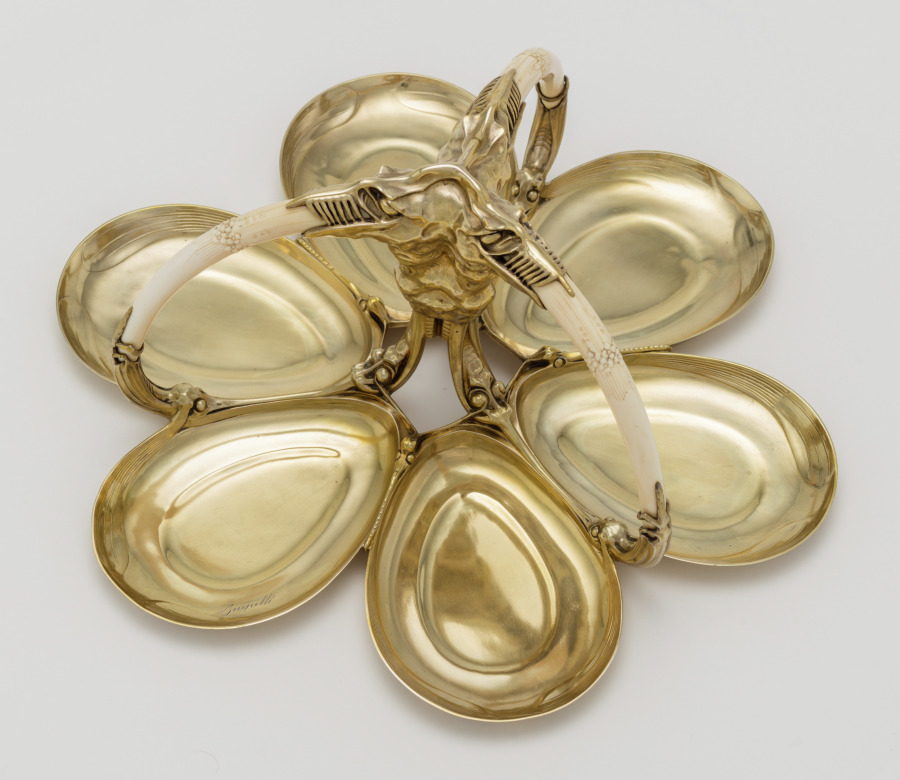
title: Salver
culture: France, Paris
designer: Carlo Bugatti (Italian, 1856–1940)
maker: Adrien-Aurélien Hebrard (French, 1866–1937)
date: c. 1907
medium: Gilt silver and ivory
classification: Silver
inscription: inscribed inside one of six ovoid compartments: "Bugatti" in ligature. Engraved on back: A.A. HEBRAND/ 8 RUE ROYAL/PARIS FRANCE.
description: This tea and coffee service, salver, and table, together with some now missing cups, were all designed by Carlo Bugatti as an ensemble and presented at the 1902 exposition devoted to decorative arts in Turin, Italy. The set was probably acquired from Bugatti's 1907 exhibition at the Galerie Hébrard in Paris by a wealthy South African widow, Anna Blake, who was living there at the time. Some of the animal and insect motifs suggest mythical beasts or the fossils of prehistoric animals. When Mrs. Blake returned to Cape Town, she took these and other pieces designed by Bugatti with her, and they remained in South Africa throughout her lifetime.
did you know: Carlo Bugatti's sons achieved illustrious careers of their own. Rembrandt Bugatti (1884-1916) became a celebrated sculptor, and Ettore Bugatti (1881-1947) manufactured luxurious automobiles and racing cars.